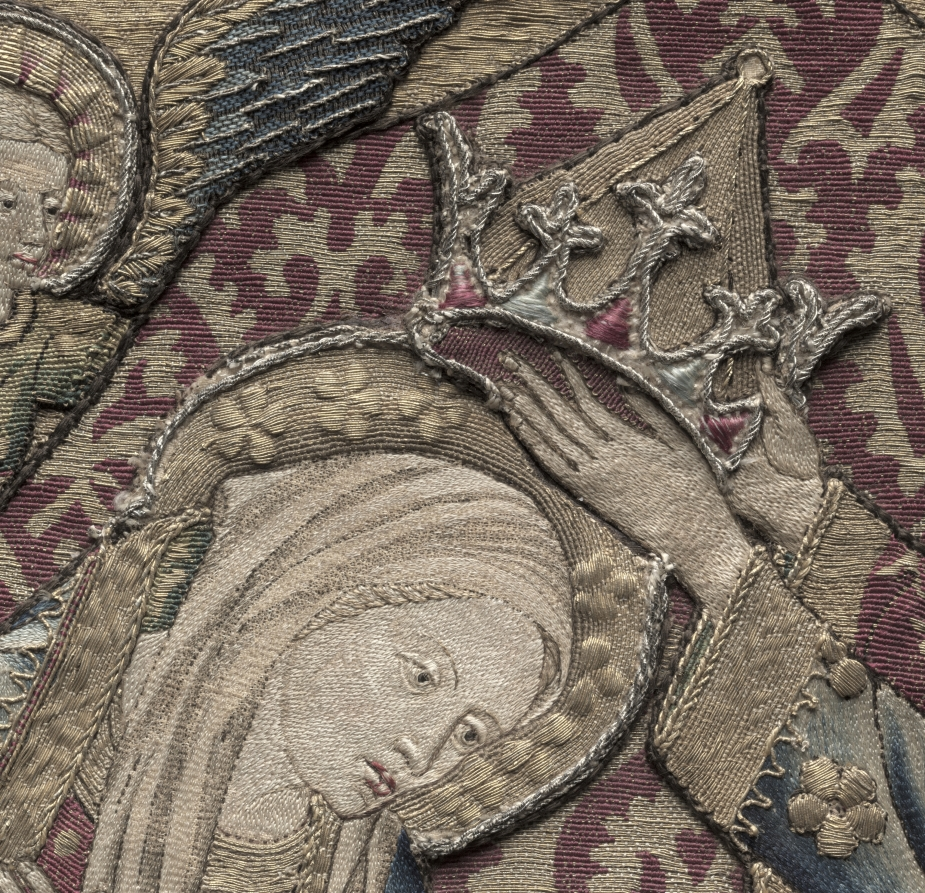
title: Embroidered Tondo from an Altar Frontal: The Coronation of the Virgin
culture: Italy, Florence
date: 1459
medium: Embroidery with gold, silver, and silk thread; split, satin, and couching stitches, or nué (shaded gold)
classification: Embroidery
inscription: the embroidery is backed by an old reused parchment with Latin writing over which in Italian is penned an inscription: "This pallioto was embroidered in the year 1486 by the venerable Margherita del Caccia nun of this monastery. . ." [It is difficult to know to what extent one should rely on this inscription as the style and technique both point clearly to an earlier date.]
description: This masterpiece of Florentine embroidery takes the circular form called a tondo and was likely once attached to an altar frontal. The scene depicts the coronation of the Virgin, the final and culminating event in the narrative cycle of her life. Honoring her as queen of heaven, Christ places the crown on his mother’s head. They are surrounded by eight angels as well as Saints Verdiana and John Gualberto, both much esteemed in Florence, creating a joyous scene. During the Renaissance, Florence emerged as an important center for a specific type of embroidery known as or nué, or shaded gold. This stunning technique used metal and silk threads, as seen here, to create pictures that rivaled paintings. It was frequently used for vestments and altar frontals.